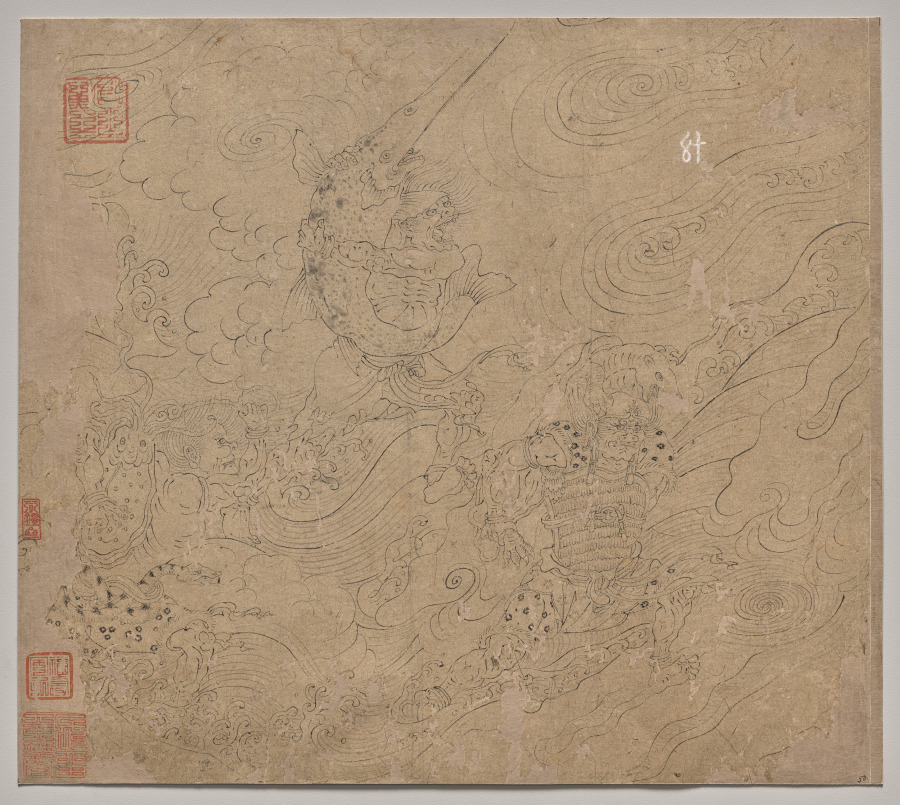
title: Album of Daoist and Buddhist Themes: Search the Mountain: Leaf 50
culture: China, Southern Song dynasty (1127-1279)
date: 1200s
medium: Album, ink on paper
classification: Painting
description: This extraordinary album has 50 paintings on a variety of religious subjects. They were likely created by several master craftsmen to share with studio apprentices as models for fulfilling commissions. The Jade Emperor and the Daoist pantheon make up the first 26 leaves. The next 14 leaves portray the Buddhist Ten Kings of Hell administering punishments to the dead. The third section, called “Clearing the Mountains,” features divine soldiers, led presumably by the deity Erlang Shen 二郎神, fighting undesirable creatures.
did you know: Demon-soldiers hold a giant swordfish and battle sea creatures amid floods and waves.